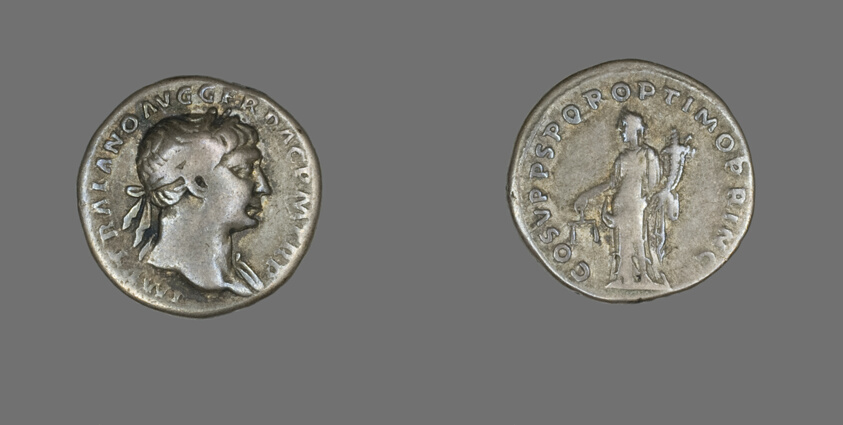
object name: Coin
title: Denarius (Coin) Portraying Emperor Trajan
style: roman (ancient, style or period)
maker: Roman, minted in Rome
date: 103-111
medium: Silver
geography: Roman Empire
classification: coin; ancient art